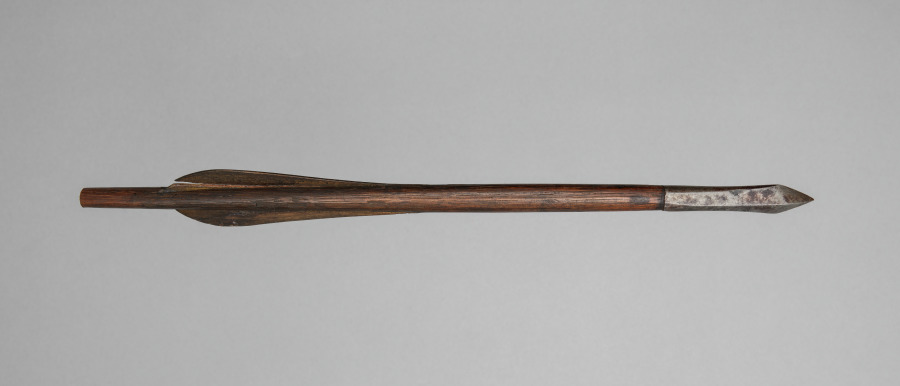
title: Crossbow Bolt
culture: Germany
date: 1500s-1600s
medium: wood, leather, steel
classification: Arms and Armor